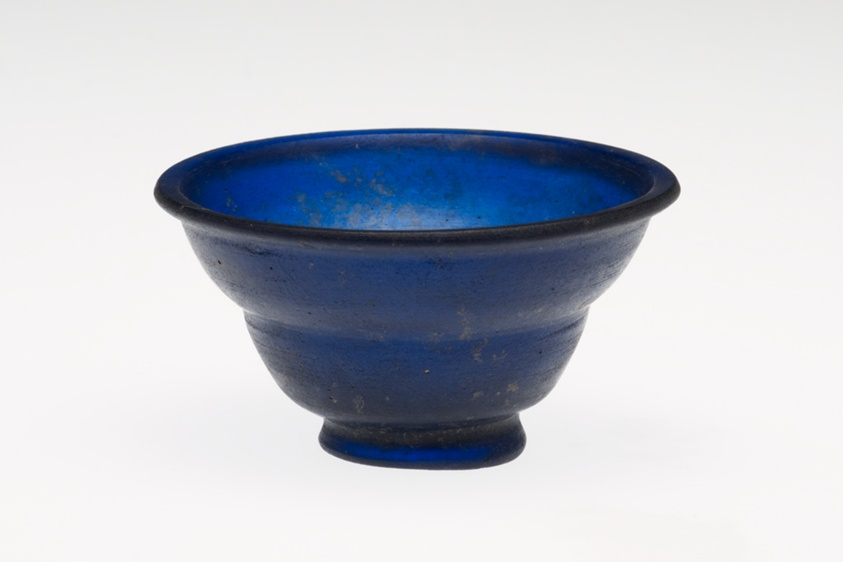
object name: Vessel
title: Bowl or Cup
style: roman (ancient, style or period), ancient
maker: Roman; probably Italy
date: Mid–1st century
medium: Glass, cast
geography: Mediterranean Region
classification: bowl; glass; vessel; ancient art; container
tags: dining, drinking